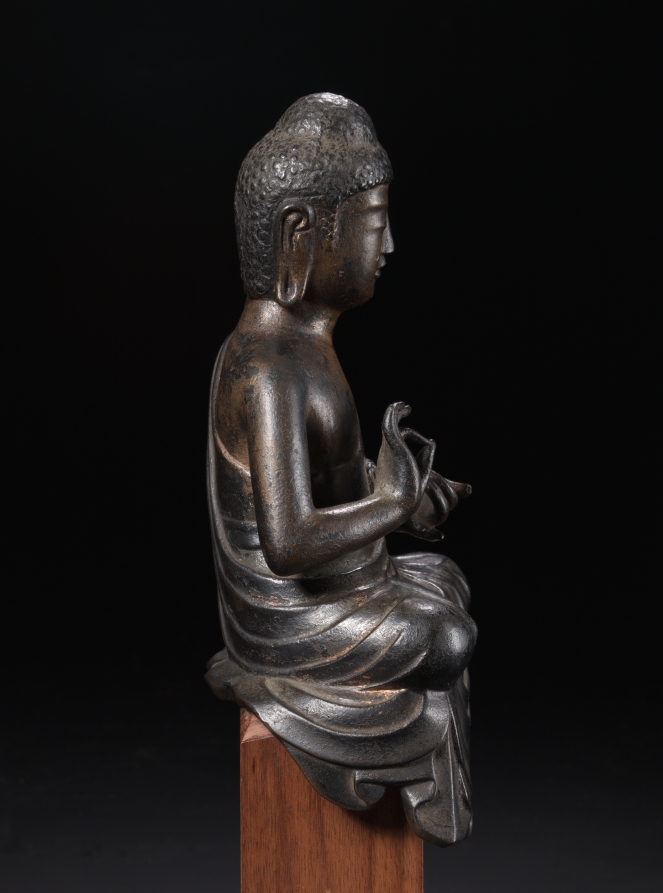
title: A Preaching Buddha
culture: Japan, Nara period (710–94)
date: 700s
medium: bronze with traces of gilt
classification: Sculpture